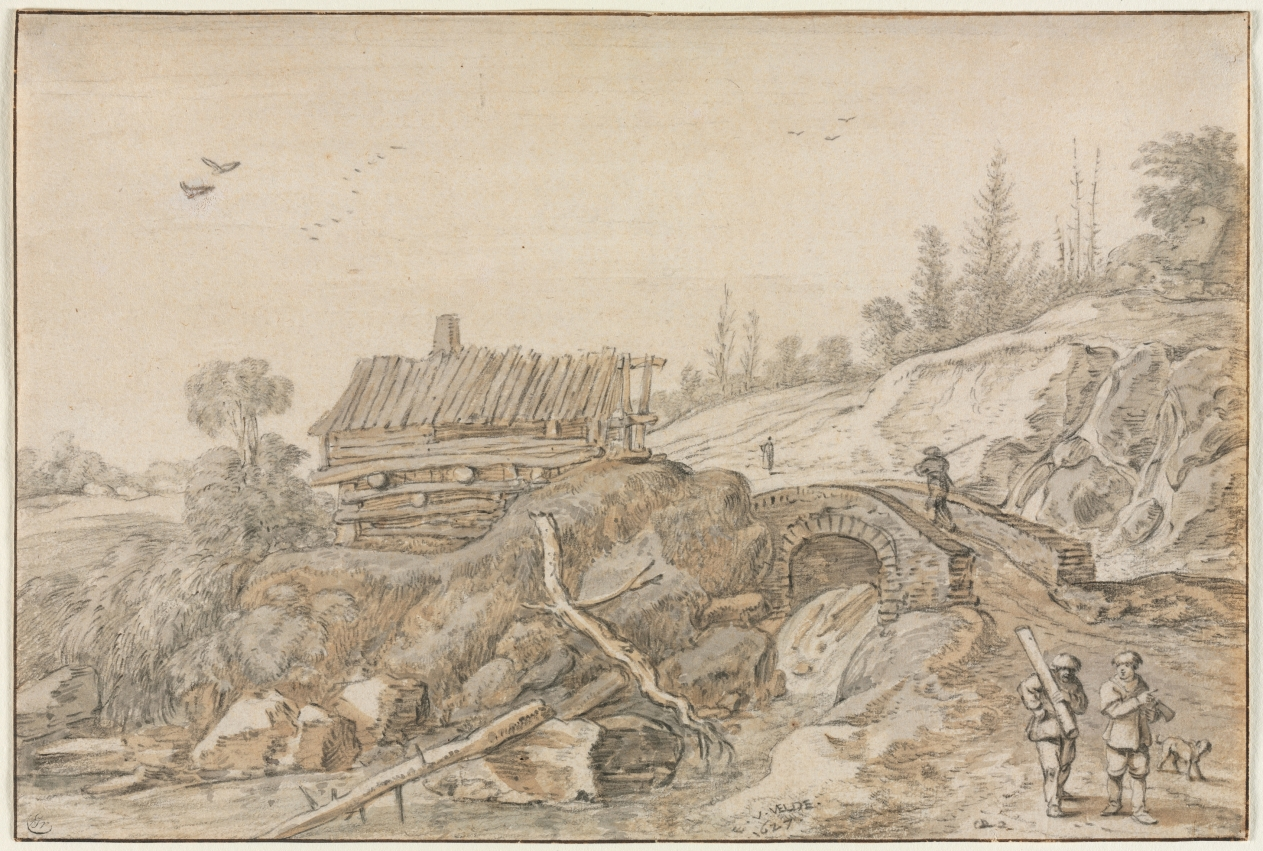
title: Hilly Landscape with Hut Beside a Stream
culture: Netherlands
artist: Esaias van de Velde (Dutch, 1587–1630)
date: 1627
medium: black chalk and brush and gray and brown wash (addition, upper left, in white paint and black chalk); framing lines in brown ink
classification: Drawing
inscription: signed, lower center, in black chalk: E. V. VELDE. / 1627 ; VERSO, center, in graphite: No 5 [erased] ; center, in graphite: Isias van de Velde ; lower left, in graphite: [illegible, erased] ; lower right, in graphite: H8 [circled] ; SECONDARY SUPPORT (fragment, now removed), upper right, in graphite: Cat no. 290 ; VERSO OF SECONDARY SUPPORT, lower right, in graphite: 1850- ; VERSO OF TERTIARY SUPPORT (fragment, now removed), lower left, in graphite: Coll. Städel (Stempel [getilgt?]). / Coll. Aug. Grahl (L. 1199) / Coll. ten Cate, Cat. 1955, No 298 ; lower right, in graphite: Boerner Sale no. 99